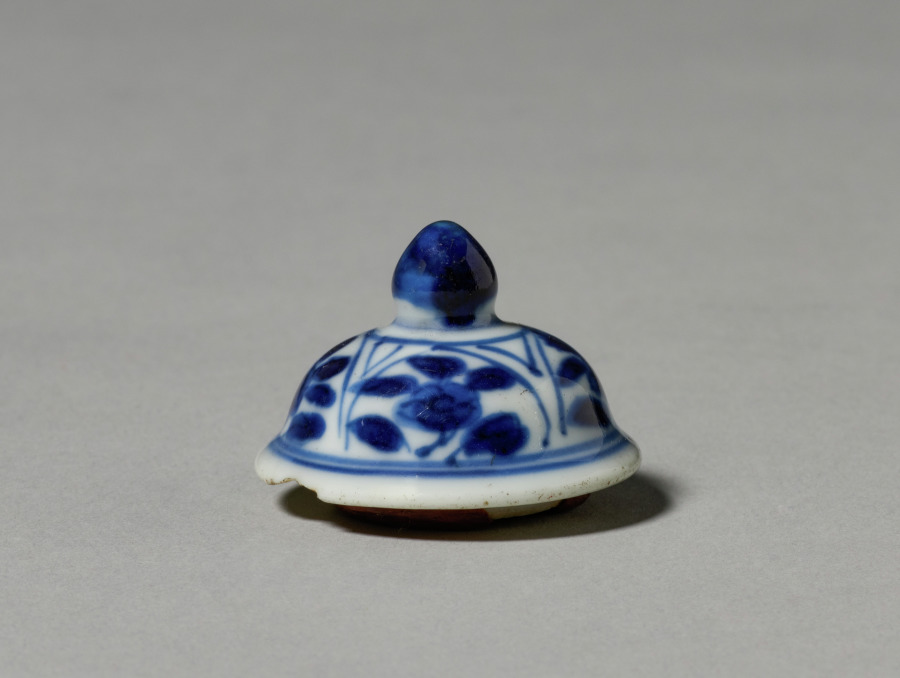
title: Jar with Cover (lid)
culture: China, Qing dynasty (1644-1911)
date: 19th Century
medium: porcelain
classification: Ceramic